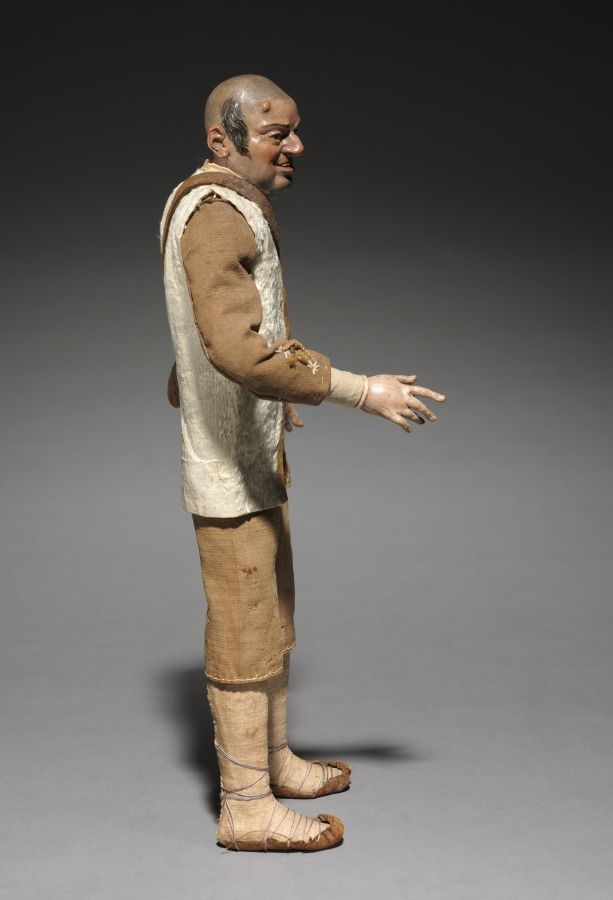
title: Figure from a Crèche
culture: Italy, Naples, late 18th-early 19th century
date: 1780–1830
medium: painted wood and terracotta with various textiles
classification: Sculpture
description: The practice of creating scenes of the Nativity for the home dates from the early 1700s in Italy, where people began to set up doll-like figures of about a foot or less in height. The custom was particularly popular in Naples around 1800, where crèche scenes (crèche means cradle, or crib) included many figures, whose heads and hands of painted terracotta, stuffed cloth bodies, and clothing adapted from contemporary local costumes gave them an amazingly realistic character. Representations of the birth of Jesus can be traced to the first few centuries of Christianity. Both living creatures and sculptural depictions of them were used from early times. By the late middle ages it was customary to create life-size figures of wood or stone, naturalistically painted, to represent the characters who participated in the events of Jesus's early life. These sculptures were then arranged in scenes illustrating one or both of the most important of these events, the Adoration of the Shepherds and the Adoration of the Magi-the three kings from the East who came to pay homage to the Christ child. Used in churches, these large figures were especially popular in Italy, Central Europe, Spain, and Portugal.